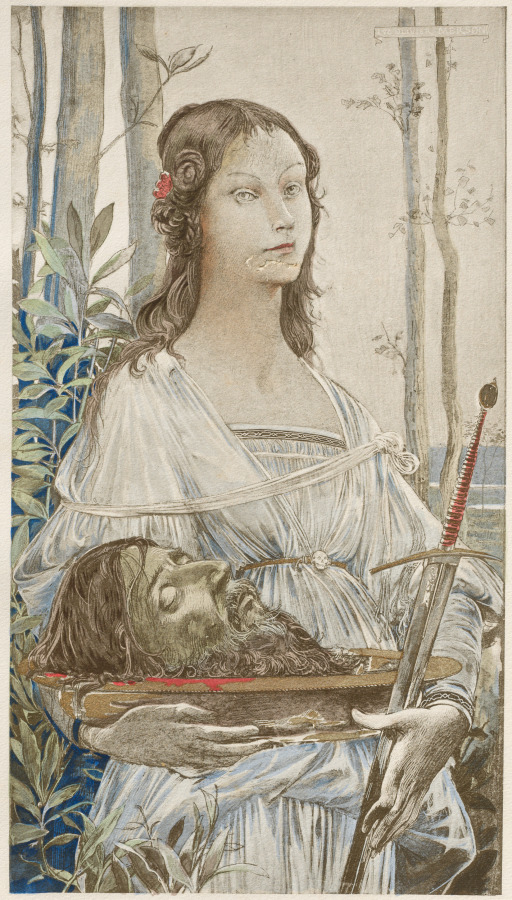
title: Salomé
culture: France, 19th century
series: L'Estampe Moderne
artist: Luc-Olivier Merson (French, 1846–1920)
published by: Imprimerie Champenois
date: 1899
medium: Color lithograph from bound volume containing 50 lithographs, each with a tissue paper guard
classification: Bound Volume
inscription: In plate, upper right corner of image: Luc Olivier Merson; lower right corner of sheet: blindstamp of l'Estampe Moderne (Lugt 2790)